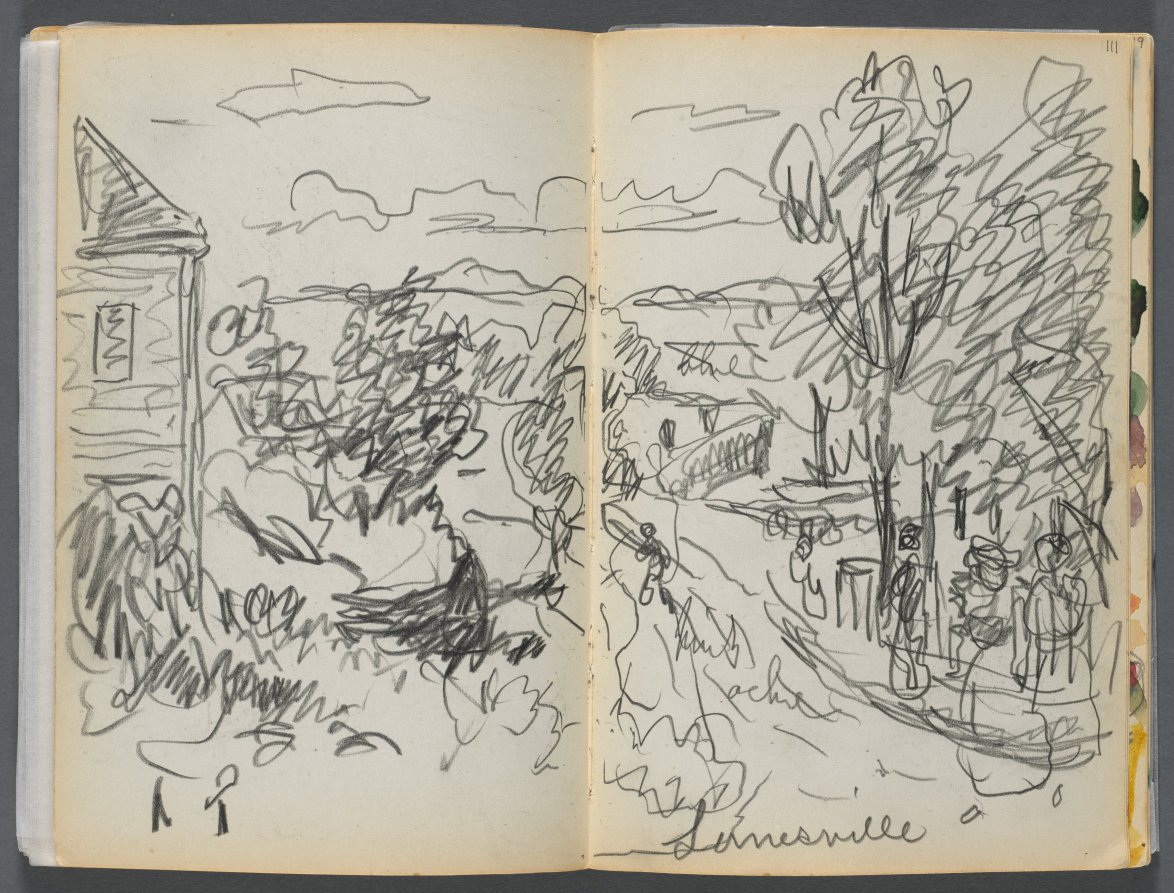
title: Sketchbook- The Granite Shore Hotel, Rockport, page 110 &111: "Lanesville"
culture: America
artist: Maurice Prendergast (American, born Newfoundland [now Canada], 1858–1924)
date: 1905–10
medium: graphite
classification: Bound Volume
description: This sketchbook contains 72 pages of pencil drawings and 9 watercolors of Cape Ann. On the inside of the cover Prendergast wrote the address of the Granite Shore Hotel in Rockport, Massachusetts.